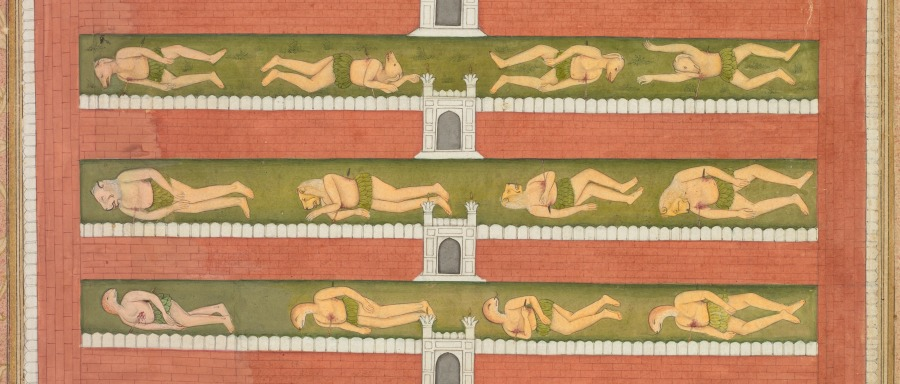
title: A Princess and Demons before a Nobleman: A Leaf from a Poetical Romance Relating to Shah Alam I (recto)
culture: Mughal India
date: c. 1710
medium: Gum tempera, ink, and gold on paper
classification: Painting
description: The source story of this painting remains enigmatic to scholars, but it includes a range of depictions of the “other”––from the foreign to the demonic. A prince kneeling in front of his horse addresses a lady; the moon in front of her face may identify her as Mahliqa (“moonlike” in Arabic), the Chinese princess identified by inscription on the adjacent page. A group of men whose eyes hang vertically stand behind her. Horned figures with grass skirts lie slain behind them, presumably killed by the kneeling prince conspicuously holding a bow. The city in the background, at the top of the painting, is populated solely by women, and its eight surrounding walls are interspersed with slain composite creatures wearing leaf skirts, which may identify them as bands of forest-dwellers, or tribal groups.